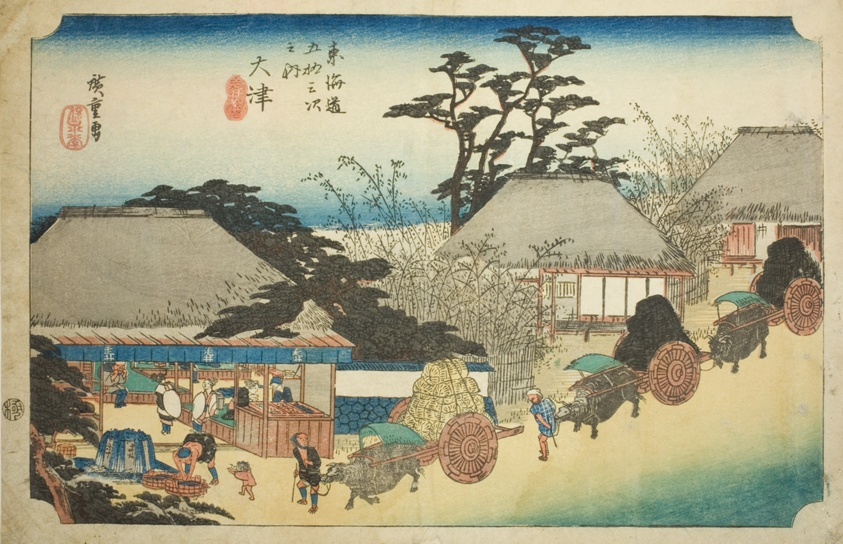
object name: Print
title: Otsu: Hashirii Teahouse (Otsu, Hashirii chaya), from the series "Fifty-three Stations of the Tokaido (Tokaido gojusan tsugi no uchi)," also known as the Hoeido Tokaido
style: Japanese (culture or style)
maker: Utagawa Hiroshige 歌川 広重; Japanese, 1797-1858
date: c. 1833/34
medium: Color woodblock print; oban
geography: Japan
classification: woodblock print; print; asian art